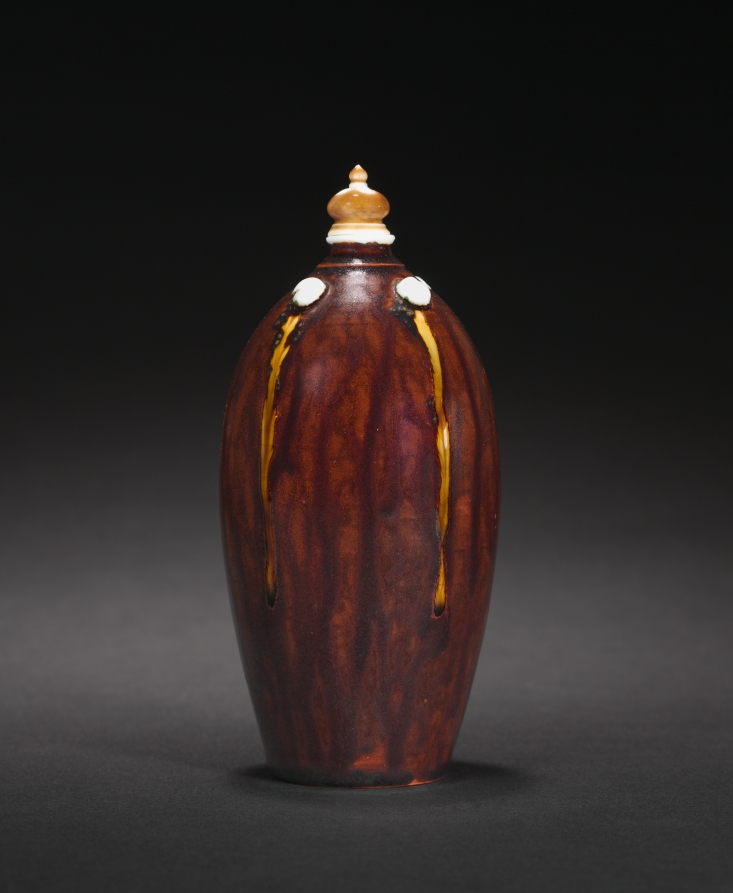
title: Covered Vase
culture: France, 20th century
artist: Sèvres Porcelain Factory (French, est. 1756)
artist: Taxile Maximin Doat (French, 1851–1939)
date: 1901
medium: porcelain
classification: Ceramic